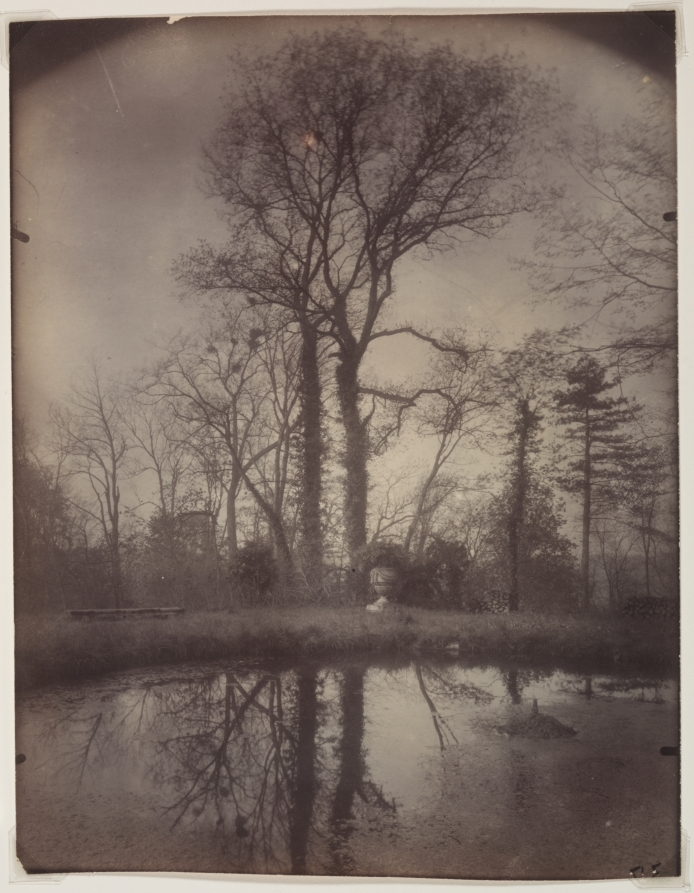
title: The Park at Sceaux [April 1925, 7a.m.]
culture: France, 20th century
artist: Eugène Atget (French, 1857–1927)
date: 1925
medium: arrowroot print, gold-toned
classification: Photograph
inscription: written in pencil on verso: "Parc de Sceaux"; "(possible initials)"?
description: After the turn of the 20th century, Atget began to photograph many of the magnificent châteaux and parks surrounding Paris. This photograph is from a series taken of the abandoned estate and garden at Sceaux in 1925 and is considered his rarest and finest. It records that fleeting moment when a tree's sculptural form and the beginning stubble of its spring foliage are both visible. Shooting directly into early morning light, Atget captured the stately trees casting long, shimmering reflections on the placid pond surface. By visually compressing the background with the foreground, he created the illusion that this scene took place on a single plane. The use of arrowroot paper, characterized by a velvety texture and cool gray tonal range, enhances the print's atmospheric quality. This picture acknowledges Atget's unmatched ability to combine descriptive information and expression subtly, thereby creating mysterious images of breathtaking beauty.